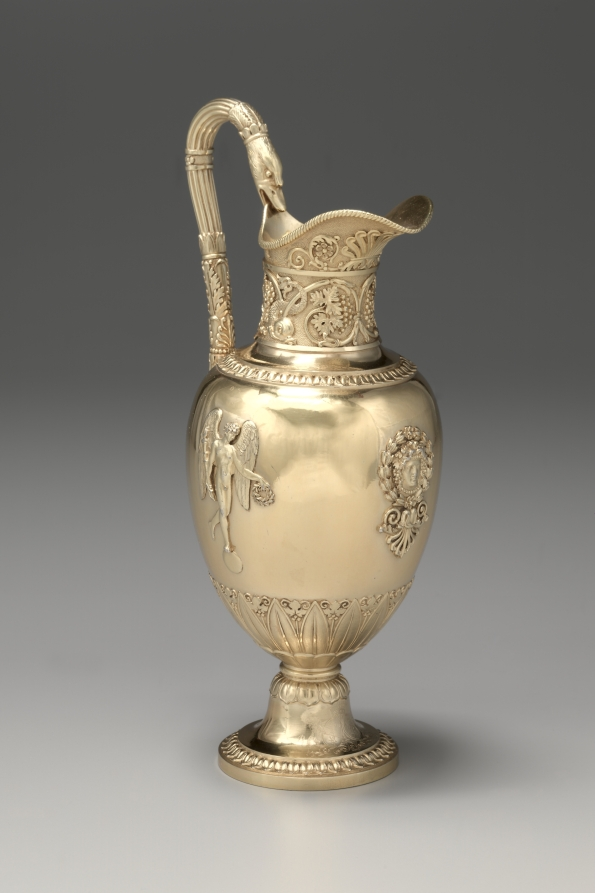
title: Ewer (aiguière)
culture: France, 19th century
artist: Jean Baptiste Claude Odiot (French)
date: c. 1817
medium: silver gilt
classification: Silver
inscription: [Excise mark for medium-sized work, Paris, 1809-1819, on edge of base]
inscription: [Two maker's marks of Jean-Baptiste-Claude Odiot after the Revolution, inside foot]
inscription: [Official assay mark for first standard silver, Paris, 1809-1819, near exterior upper rim]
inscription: [Applied coat of arms of the count Alfred de la Chapelle, Seigneur of Morton and Beaulieu, Périgord “accolé” with an alternate version of de la Chapelle, exterior of foot]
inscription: [Struck twice, interior foot]: "ODIOT"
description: Jean-Baptiste-Claude Odiot’s reputation stretched internationally. Commissioned by Russian count Nikolei Demidoff, this ewer was one part of an extensive silver dinner service. Decorated with motifs of classical antiquity, this object’s Greco-Roman silhouette, grape vine frieze, raised mythological figures, and sinuous swan’s neck handle were likely inspired by the designs of Charles Percier and Pierre-François Fontaine, architects of Napoleon I.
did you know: The coat of arms on the foot of this ewer belongs to the count Alfred de la Chapelle who owned this silver dinner service during the second half of the 19th century.